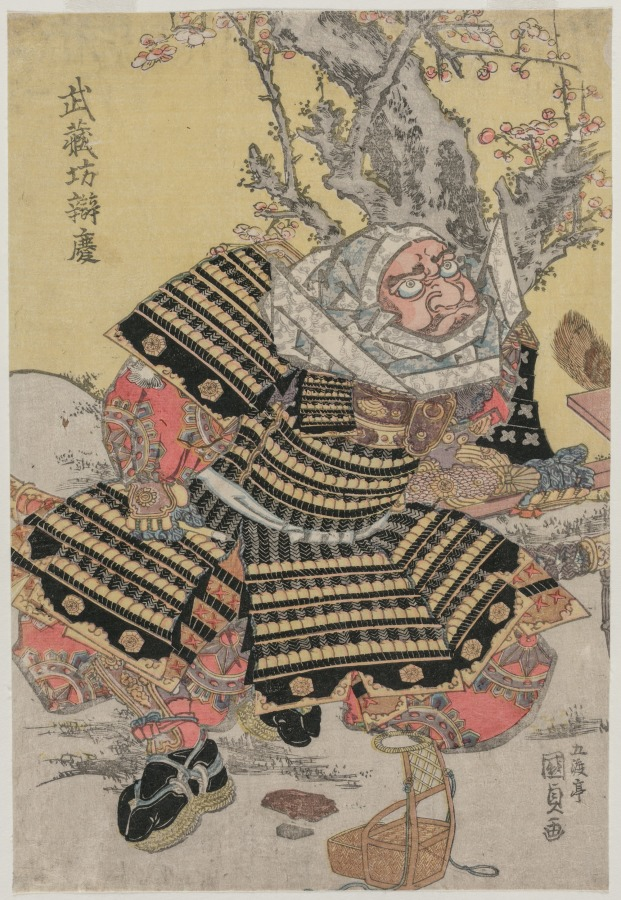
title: Musashibo Benkei Kneeling by a Plum Tree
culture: Japan, Edo period (1615–1868)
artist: Utagawa Kunisada (Japanese, 1786–1865)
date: c. mid or late 1810s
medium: color woodblock print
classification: Print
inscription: Signature: Gototei Kunisada ga